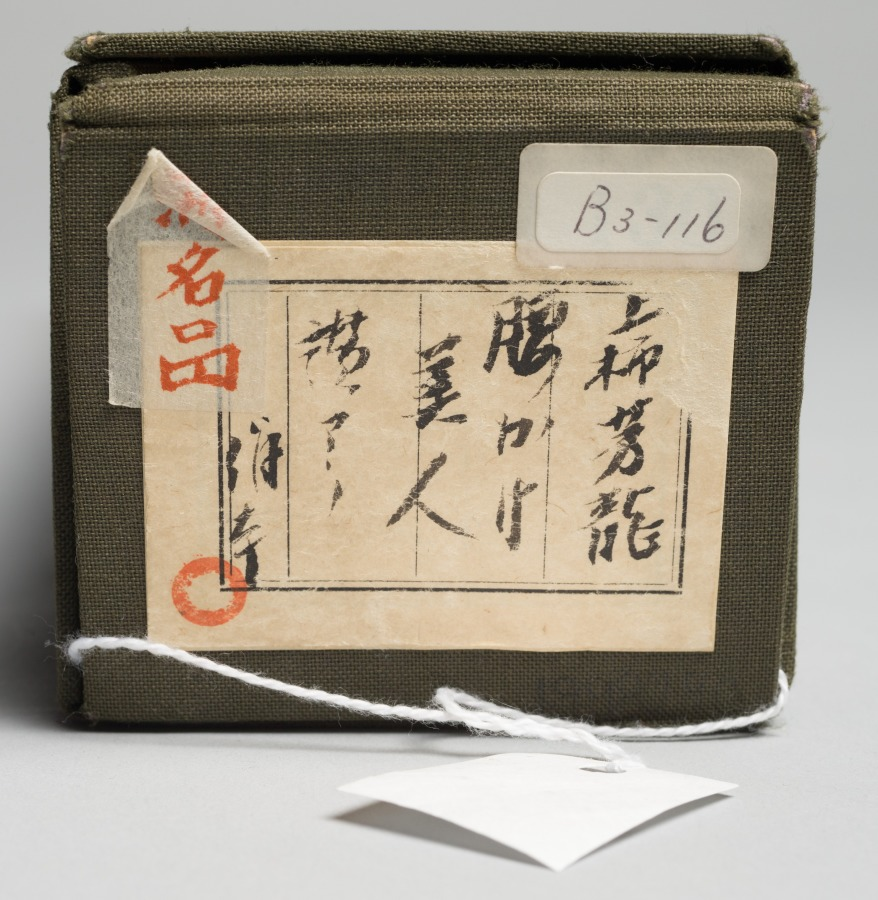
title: Courtesan Seated on a Bench Enjoying the Evening Cool in Summer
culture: Japan, Edo period (1615–1868)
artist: Kamigaki Hōryū (Japanese, dates unknown)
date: 1615–1868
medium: hanging scroll, ink and color on silk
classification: Painting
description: In a pensive pose with her chin resting in her hand, a courtesan is seated on a wooden bench that extends diagonally across the lower half of the scroll. Her open robe suggests that it is a warm evening-perhaps late summer or early fall, as indicated by the grapevine pattern on her kimono. The floral patterns in the composition hint at the seasons: the plum blossom on the fan for spring; grape pattern on the robe for late summer; and chrysanthemum design on the bench indicating autumn. Note also how the grapevine pattern in the painting's mounting mimics the design of her kimono. The overall mood is one of intimacy, created by Hõryþ through the delicate rendering of the courtesan's facial features and hands. In contrast to the other scrolls of beauties nearby, the artist here portrayed his subject with little background, allowing her grace and elegance to carry the picture.